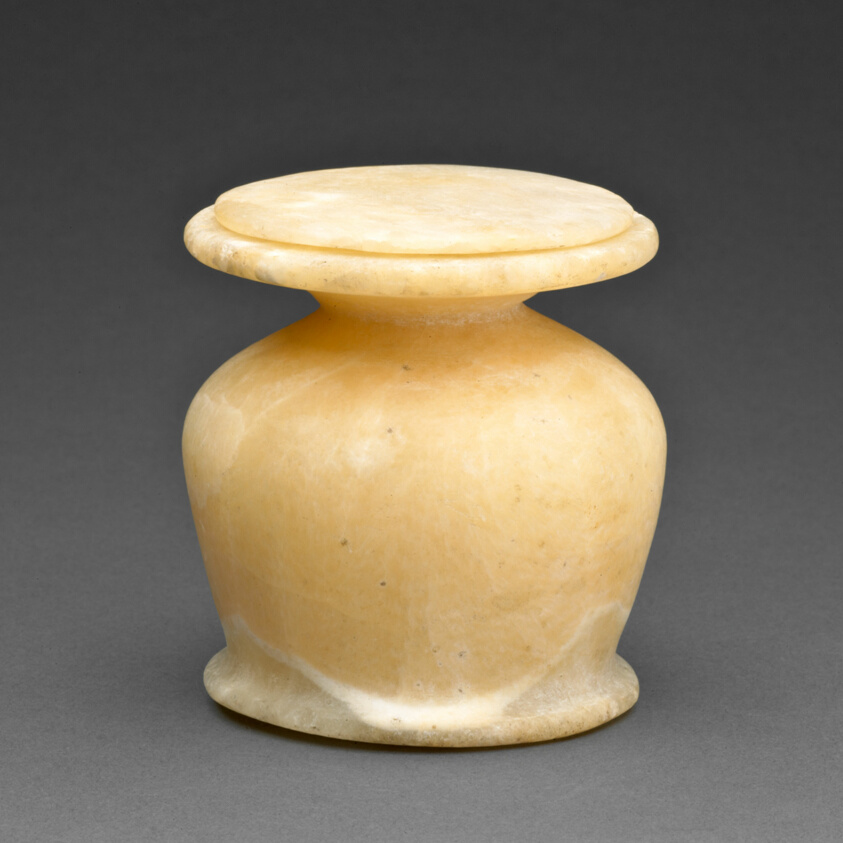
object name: Vessel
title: Kohl Jar with Lid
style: middle kingdom, twelfth dynasty, egyptian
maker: Egyptian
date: Middle Kingdom, Dynasty 12 (about 1985–1773 BCE)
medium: Travertine (Egyptian alabaster)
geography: Egypt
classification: personal grooming / hygiene / cosmetic container; container; vessel; ancient art